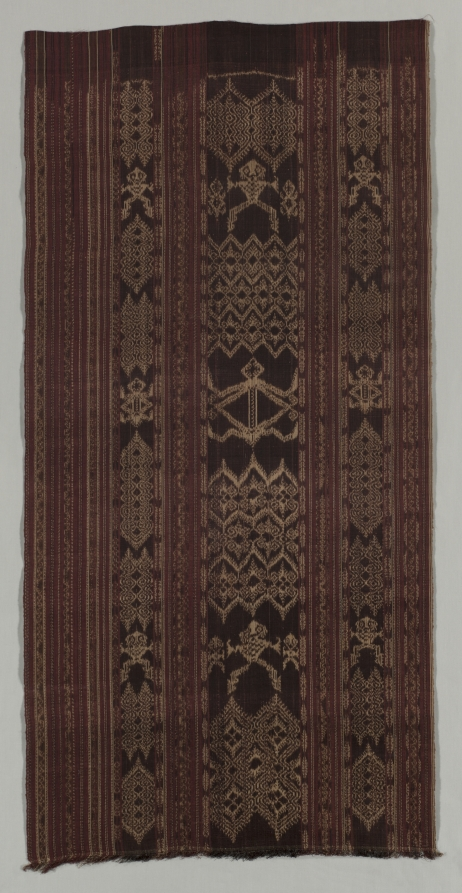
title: Mandaya ikat textile (dagmay)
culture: Philippines, Mindanao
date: c. early 1900s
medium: hemp: plain weave, dyed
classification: Textile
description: This textile is a Mandaya abacá ikat cloth woven in southeastern Mindanao. It is made from hand-stripped abacá fibers that are resist-dyed using the Mandaya ikat technique, in which selected warp threads are tightly bound before dyeing to produce patterned sections during weaving. The designs embody Mandaya cosmology and are traditionally associated with protection, fertility, and the presence of umagad (ancestral spirits).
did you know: After weaving, abacá ikat cloths were soaked in iron-rich river mud, which deepens the browns and blacks, strengthens the fiber, and sets the dyes.